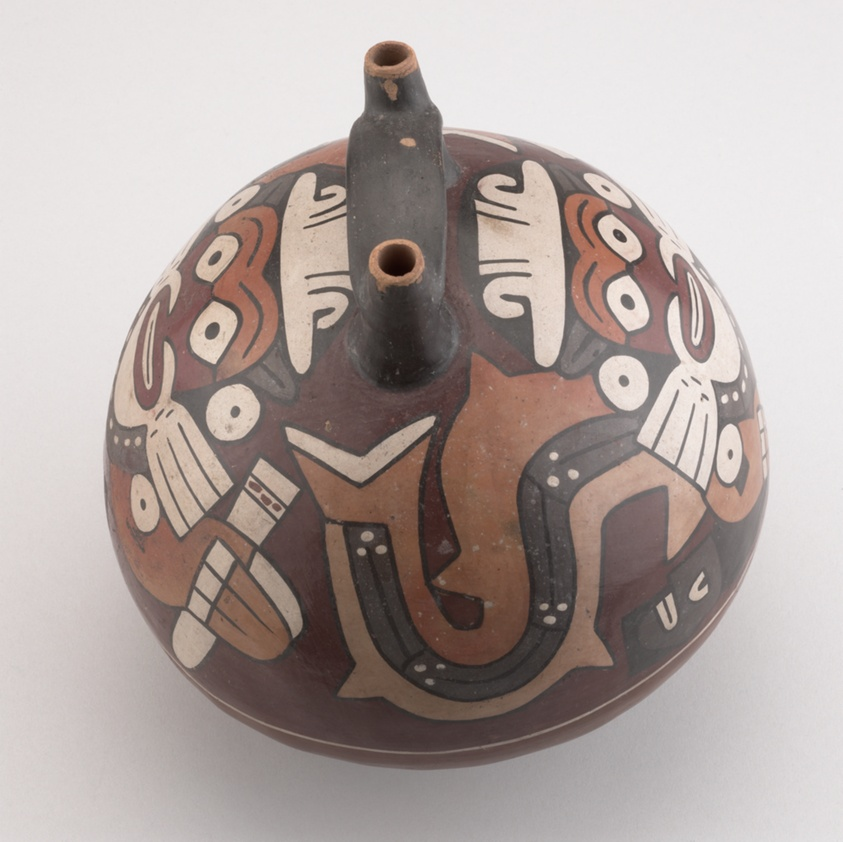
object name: Vessel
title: Vessel with Marine Beings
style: nazca, early intermediate period, Pre-Columbian, americas, andes, Arts of the Americas, andean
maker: Nazca; South coast, Peru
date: 50–500 CE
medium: Ceramic and pigment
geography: Peruvian South Coast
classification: earthenware; art of the americas; ceramics; vessel; masks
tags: people, animals, composite, fish, sacrifice, warriors, costumes, masks